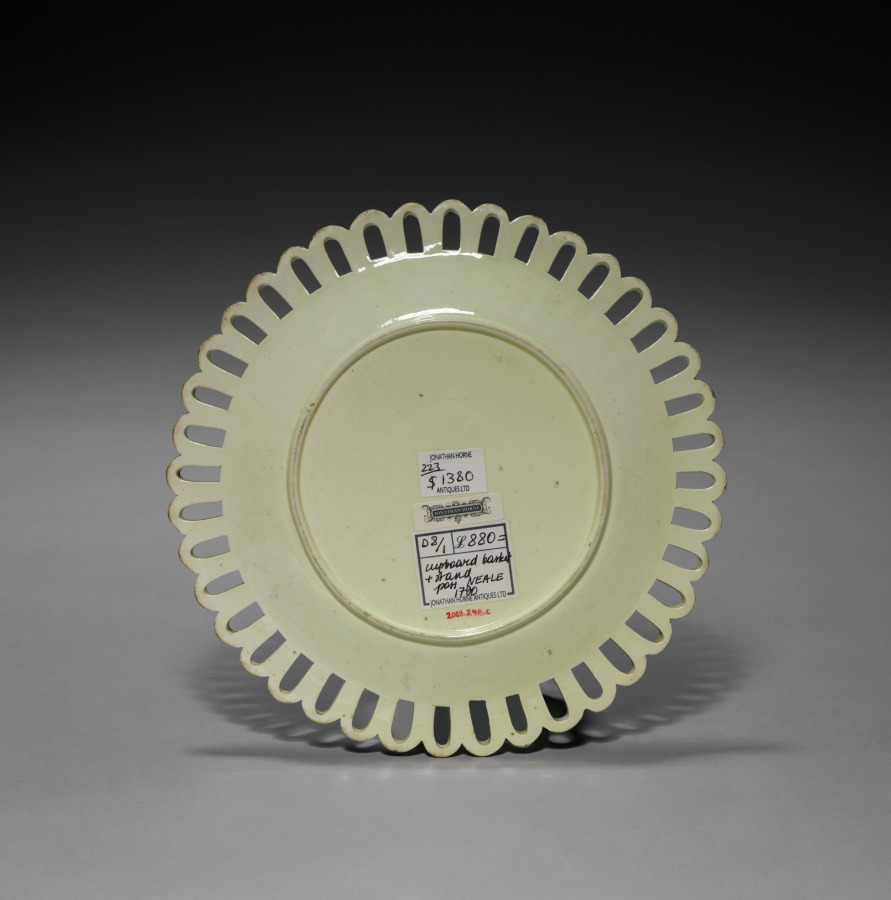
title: Stand for a Sauce Tureen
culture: England, 18th-19th century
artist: Wedgwood Factory (British)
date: c. 1780–1840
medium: earthenware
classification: Ceramic